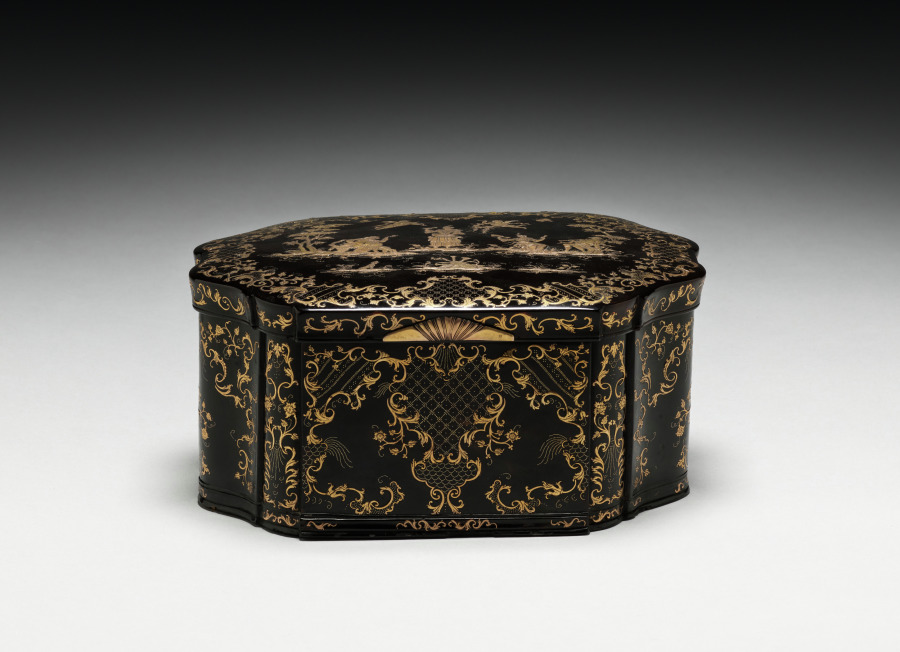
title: Box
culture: Italy, Naples (?), 18th century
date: c. 1750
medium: tortoise shell and gold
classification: Miscellaneous